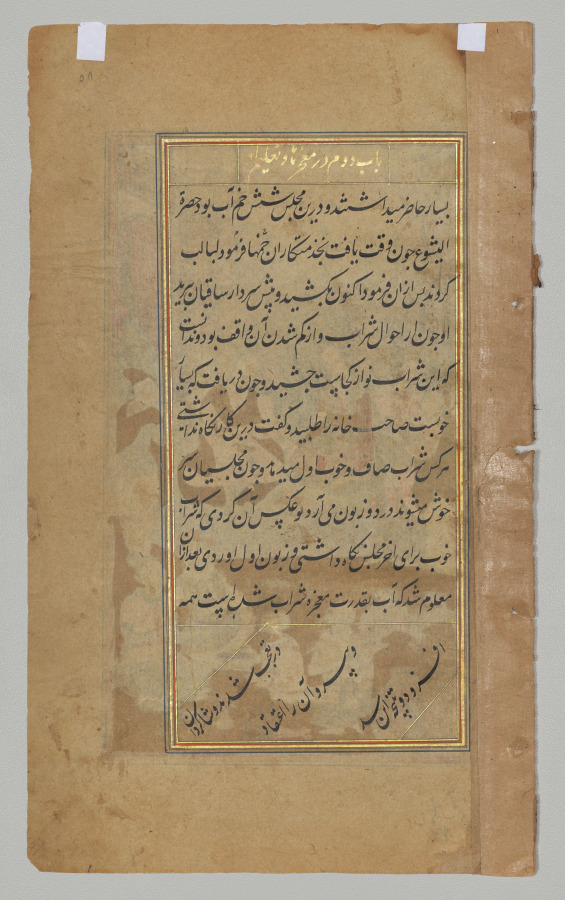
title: Text page from a Mirror of Holiness (Mir’at al-quds) of Father Jerome Xavier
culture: Mughal India, Allahabad, made for Prince Salim (1569–1627)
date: 1602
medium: Ink and gold on paper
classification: Manuscript